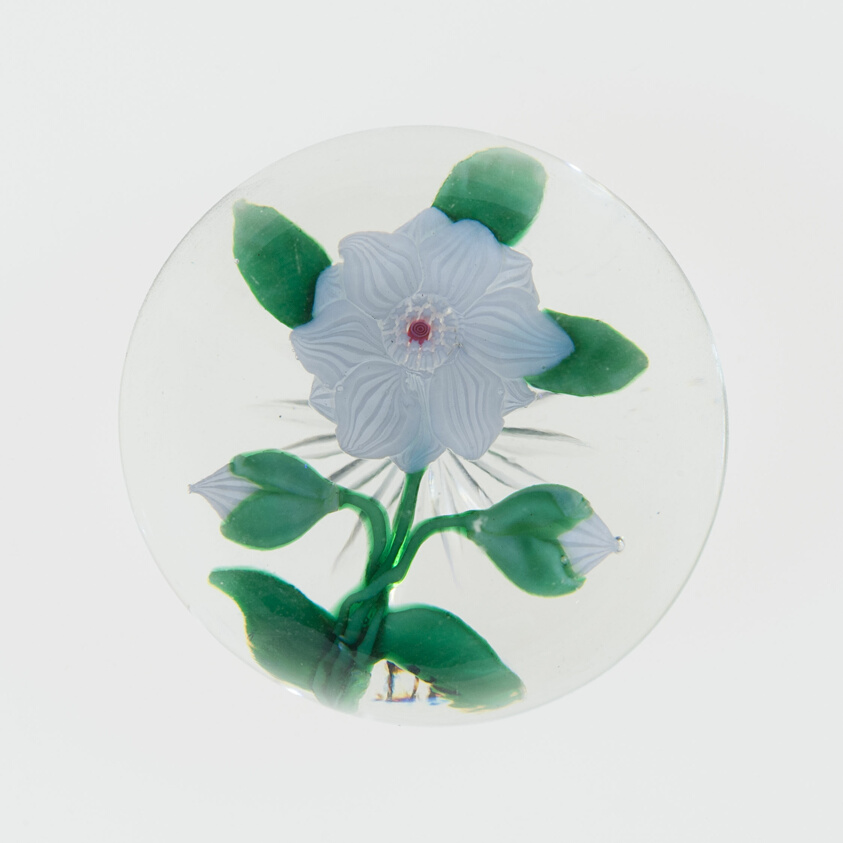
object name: Glass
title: Paperweight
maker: Baccarat Glassworks (Cristalleries de Baccarat); Lorraine, France, founded 1764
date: c. 1848–55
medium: Glass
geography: Lunéville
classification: paperweight; lampwork; european decorative arts; glass